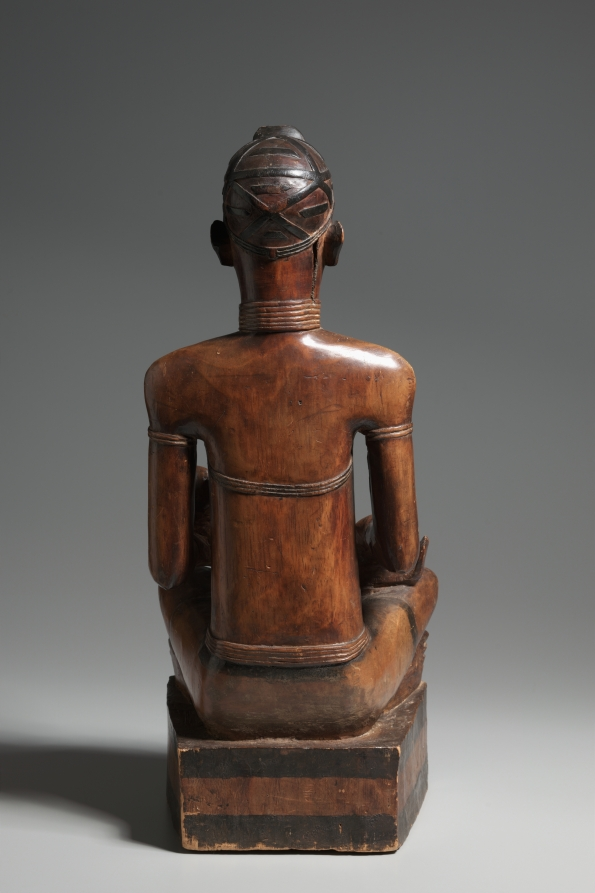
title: Mother and Child Figure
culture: Africa, Central Africa, Democratic Republic of Congo (most likely), Cabinda, or Republic of the Congo, probably Yombe-style maker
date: late 1800s–early 1900s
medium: Wood and paint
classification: Sculpture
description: This Mother and Child Figure is attributed to the Yombe peoples, who inhabit a large territory now divided among the nations of Congo, Democratic Republic of Congo, Zambia, and Angola. Its origin has been traced to the areas surrounding the village of a master carver in the western Democratic Republic of Congo, where similarly carved objects were collected in the early 20th century. Its naturalism suggests that it could have been the portrait of a real person, and thus an excellent testimonial to the immense talent of the artist who carved it. Once referred to as the “Burniaux maternity figure,” after the Belgian collector F. Burniaux, who owned it from about 1930 to 1980, the sculpture was acquired by the Cleveland Museum of Art in 1998.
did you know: The sculpture may have been carved in honor of a woman after her death, or after the death of a male chief. Kongo society is matrilineal, so the chief's right to political power is inherited through the female line.